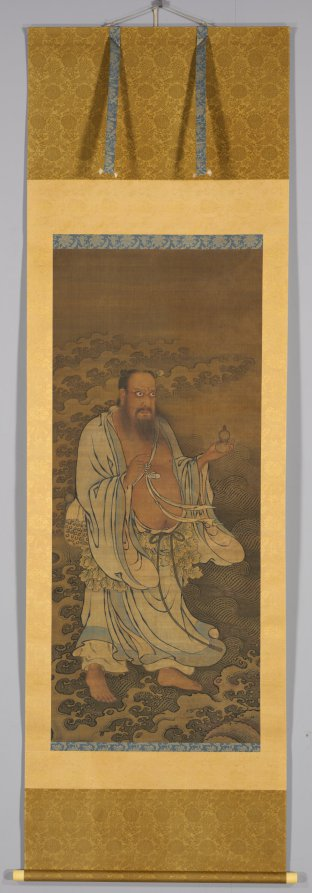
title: Zhongli Quan Crossing the Ocean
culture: China, Ming dynasty (1368–1644)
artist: Zhao Qi (Chinese, active early 1500s)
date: 1368–1644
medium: Hanging scroll; ink and color on silk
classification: Painting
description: Here, Zhongli Quan is crossing the ocean. He is one of the Eight Immortals (baxian), a group of popular Daoist figures who understood the way of life and could transform into otherworldly beings. Zhongli Quan is usually depicted as a scholar with a big belly seen through his partially open robe. The artist used expressive brushwork to depict the immortal’s fluttering robe and the roaring waves, skillfully creating a sense of movement. This scroll may have been one of a set depicting the Eight Immortals. Although the painting has no signature or seal, its style supports an attribution to the Ming dynasty painter Zhao Qi.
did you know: Zhongli Quan wears a girdle of leaves, a common Daoist immortal-recluse attribute.